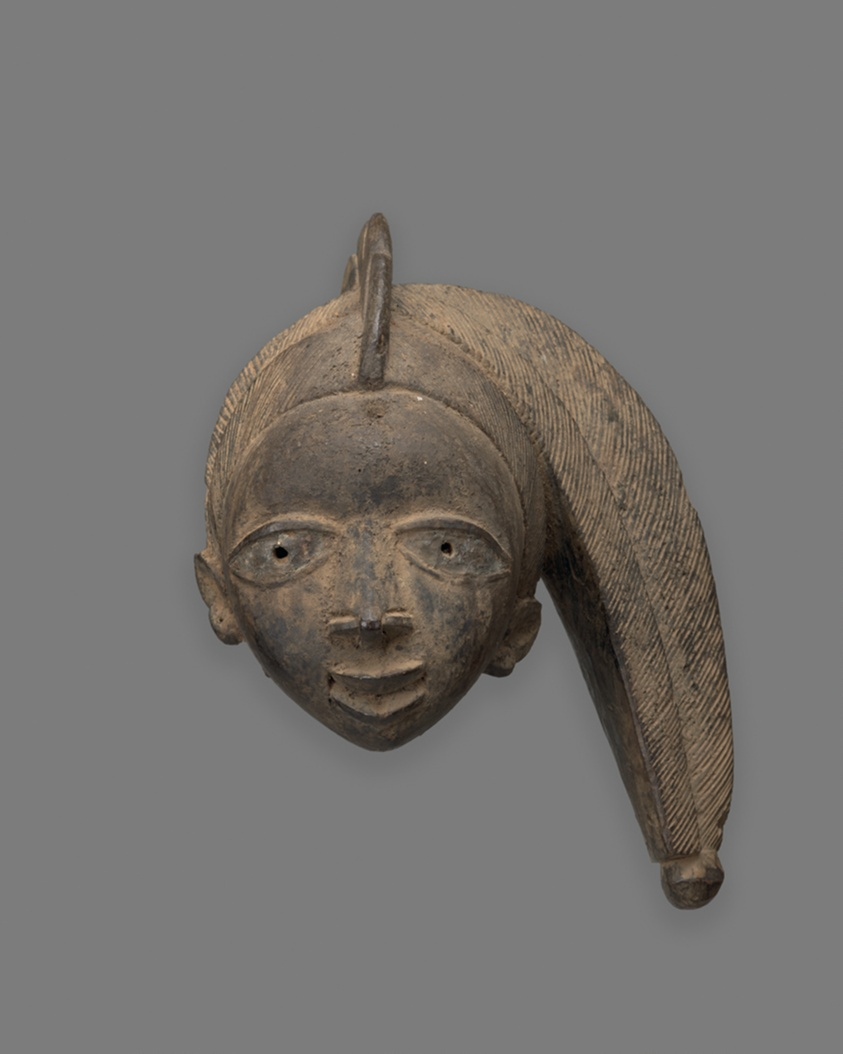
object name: Mask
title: Headdress (Ago Egungun)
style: yoruba, Arts of Africa, Coastal West Africa, african Art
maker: Ojerinde (died about 1914); Yoruba; Abeokuta, Nigeria; Coastal West Africa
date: Mid–late 19th century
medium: Wood and pigment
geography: Nigeria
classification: headdress; arts of Africa; masquerade; african art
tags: ancestors, family, ritual, medicine, hunter, masquerades, performance